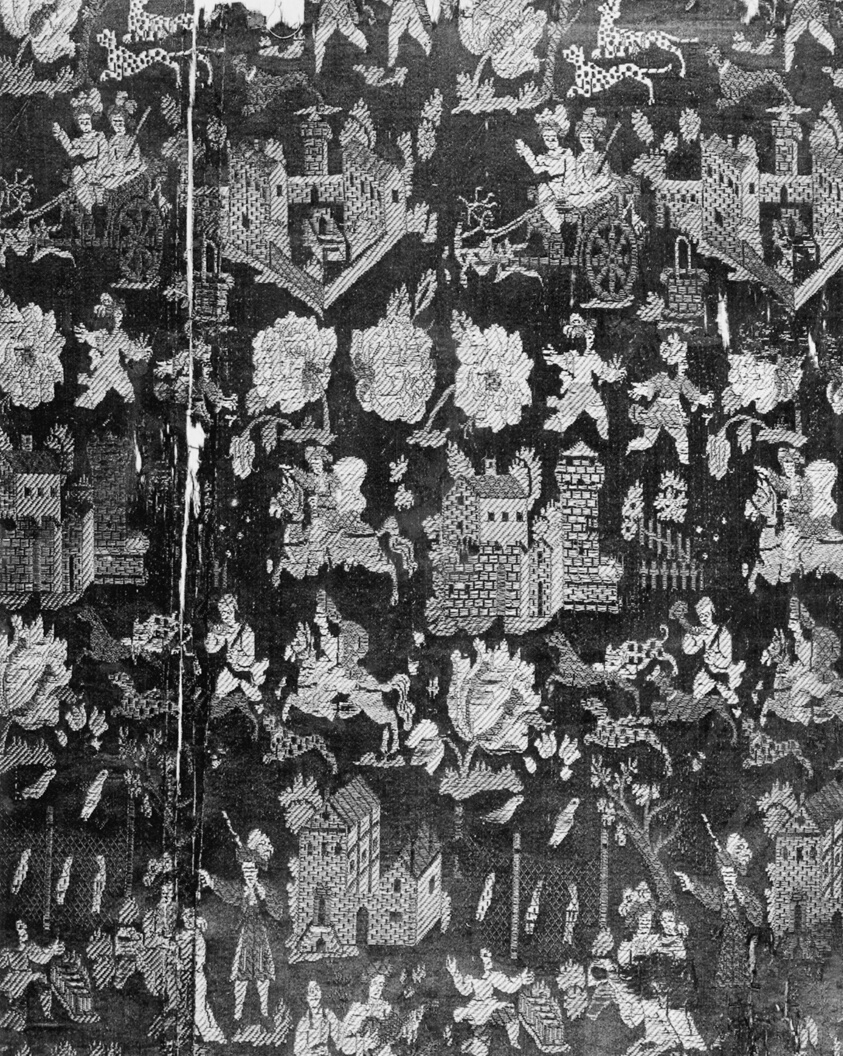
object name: Textile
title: Panel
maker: Spain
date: 17th century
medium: silk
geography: Spain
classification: textile; weaving